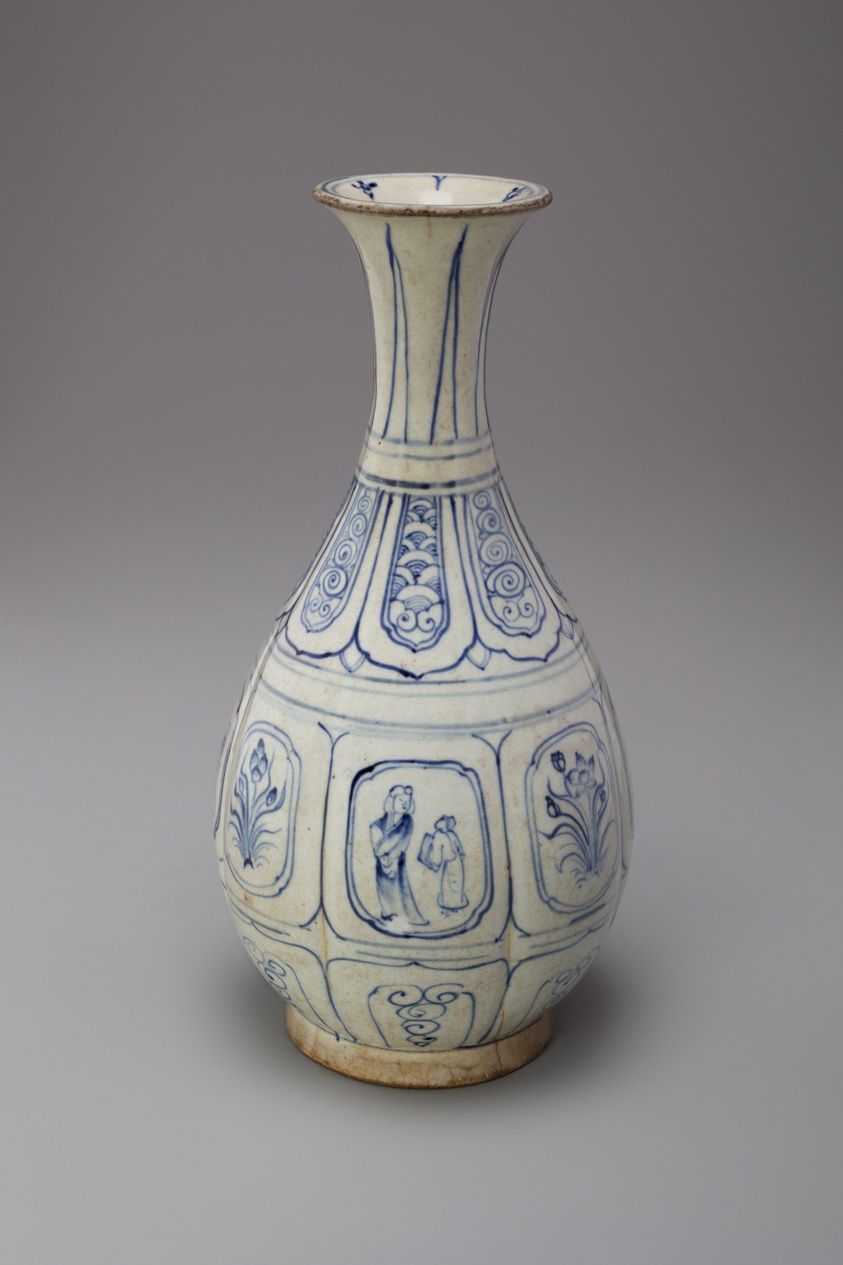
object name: Vessel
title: Pear-Shaped (Yuhuchun) Bottle with Everted Lip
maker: Vietnam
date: 15th century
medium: Stoneware with cobalt-blue underglaze and transparent gray glaze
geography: Vietnam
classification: porcelain; asian art; ceramics; vessel